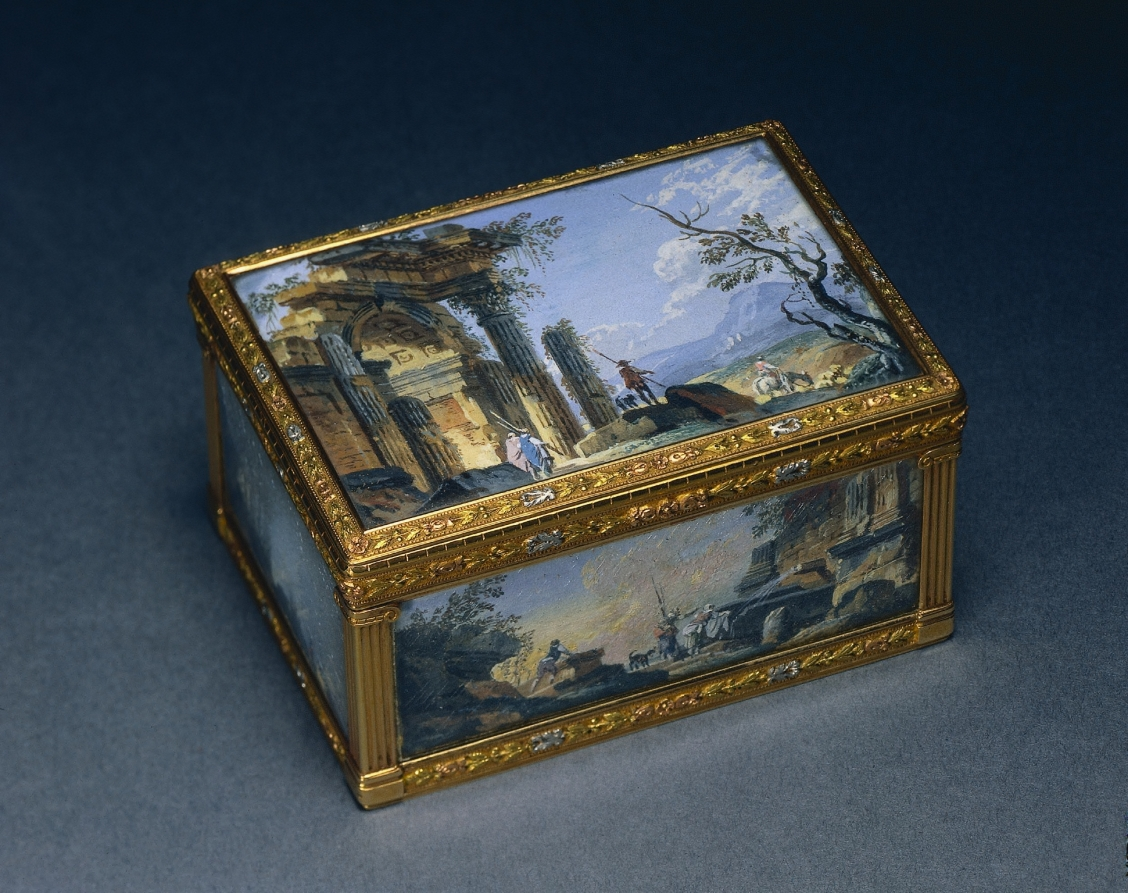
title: Rectangular Box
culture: France, 19th century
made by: Alexandre Leferre (French)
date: c. 1840–1850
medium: gouache miniatures mounted on gold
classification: Miscellaneous